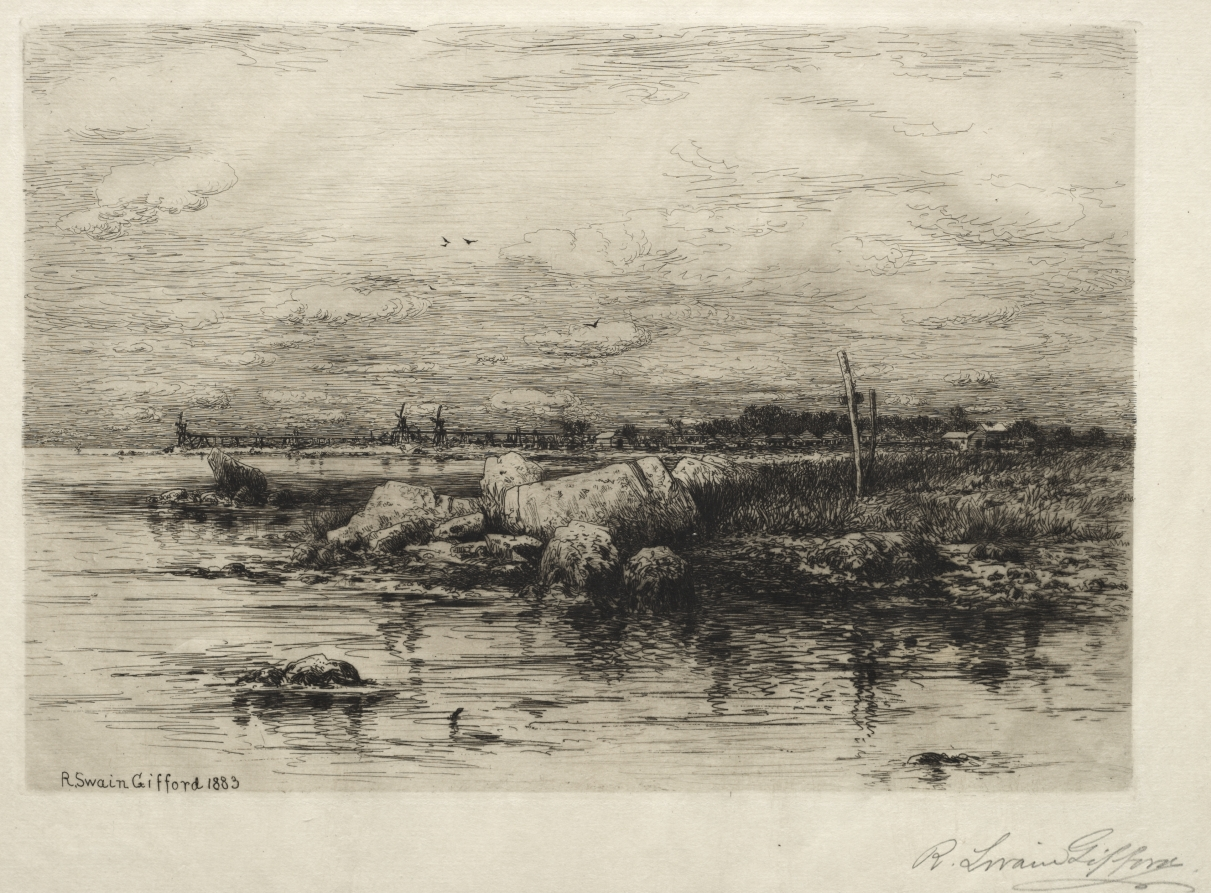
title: Mouth of the Apponaganasett River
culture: America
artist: Robert Swain Gifford (American, 1840–1905)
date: 1883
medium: etching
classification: Print